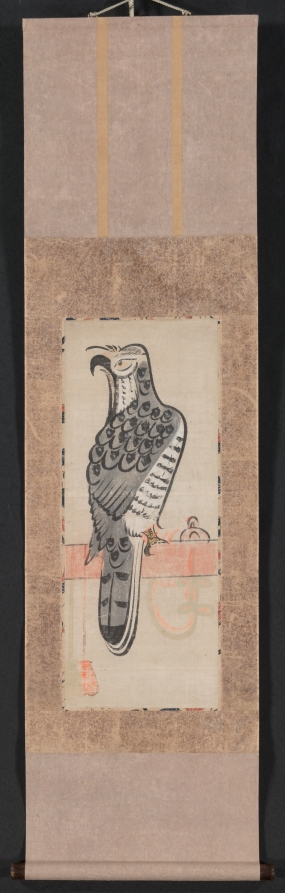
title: Falcon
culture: Japan, Edo period (1615–1868)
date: 1615–1868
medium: hanging scroll; ink and color on paper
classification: Painting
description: This otsu-e painting depicts a hunting falcon, a lucky charm for a bountiful harvest.